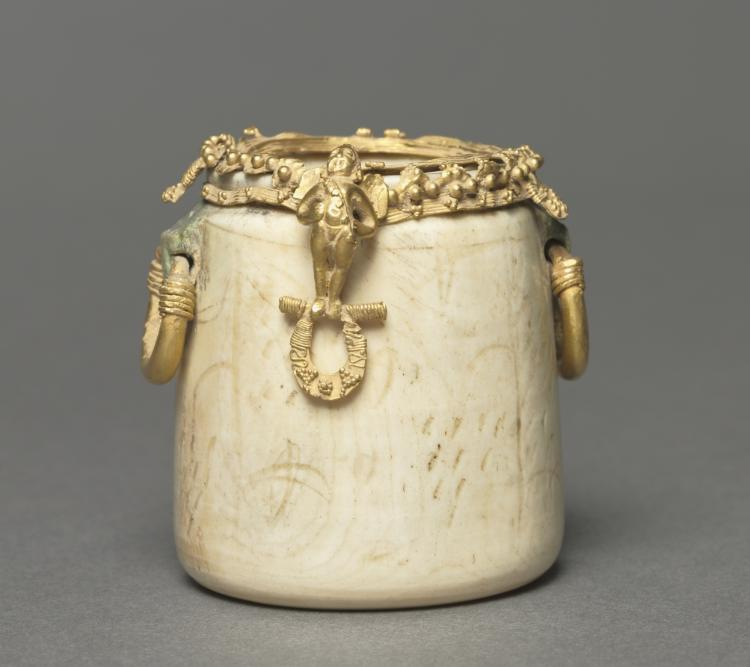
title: Cosmetic Jar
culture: Byzantium, probably Syria, early Byzantine period, 6th century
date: 500–550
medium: ivory and gold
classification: Metalwork